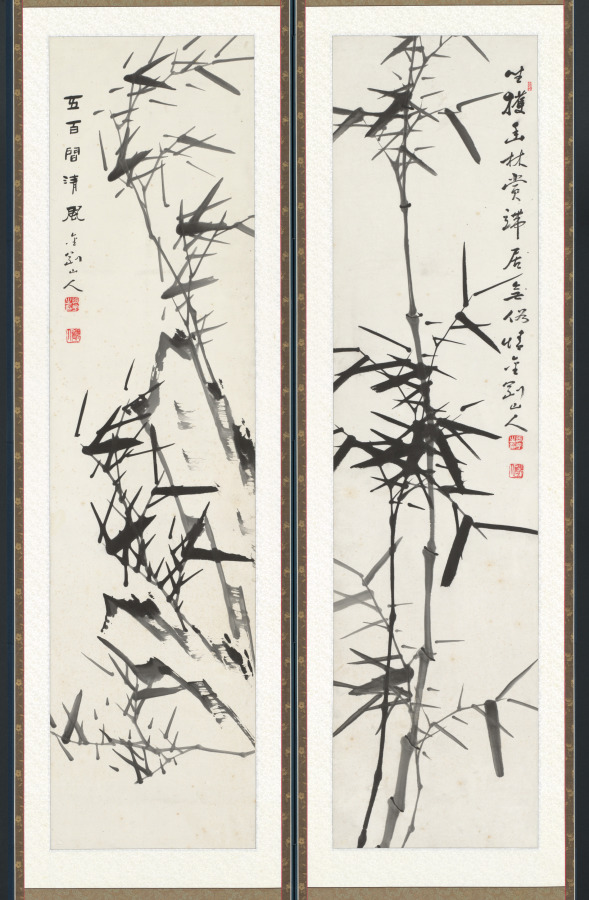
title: Bamboos in Wind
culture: Korea, Japanese colonial period (1910−1945)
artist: Kim Jin-woo (Korean, 1883–1950)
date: 1934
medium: Ten-panel folding screen; ink on paper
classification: Painting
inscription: Two chops stamped on each panel: 振宇之印 (Jinwoo’s Seal); 金剛山人 (Diamond Mountain Man)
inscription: Inscription written on the far-left panel: 甲戌流??寫於竹林堂金剛山人振宇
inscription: Inscription written on the 8th panel: 五百間淸風金剛山人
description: Active during the Japanese colonial period in Korea (1910–45), the artist Jin-woo Kim earned his artistic reputation for his expressive renditions of bamboo swaying in a strong wind. His piercing bamboo shoots are often compared to an iron spear, and their sharp leaves to a knife. It is believed that he deliberately emphasized sharpness in his brushstrokes to express his strong resistance against Japanese colonial oppression.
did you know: The artist’s prolific artistic production were a major part of fundraising efforts to support resistance activities for Korea’s independence.